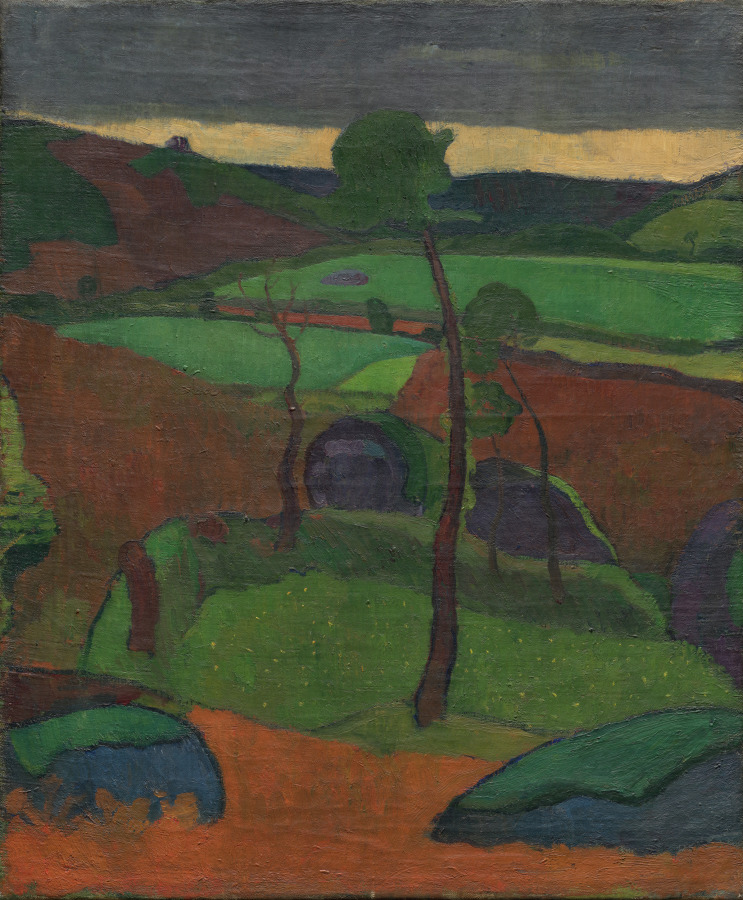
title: Breton Landscape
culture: Netherlands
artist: Jan Verkade (Dutch, 1868–1946)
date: 1891–92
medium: oil on canvas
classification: Painting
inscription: none known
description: Brittany, in northwestern France, was an important place to Verkade both artistically and spiritually. The artist was captivated by the terrain that differed so greatly from that of Amsterdam, inspiring a series of Breton landscapes. Verkade also converted to Catholicism during his travels to Brittany, shifting the trajectory of his art away from landscapes and toward a revival of religious painting and sacred art.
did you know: Verkade painted many landscapes, including a drop cloth he painted for a puppet show titled Les Sept Princesses (The Seven Princesses).